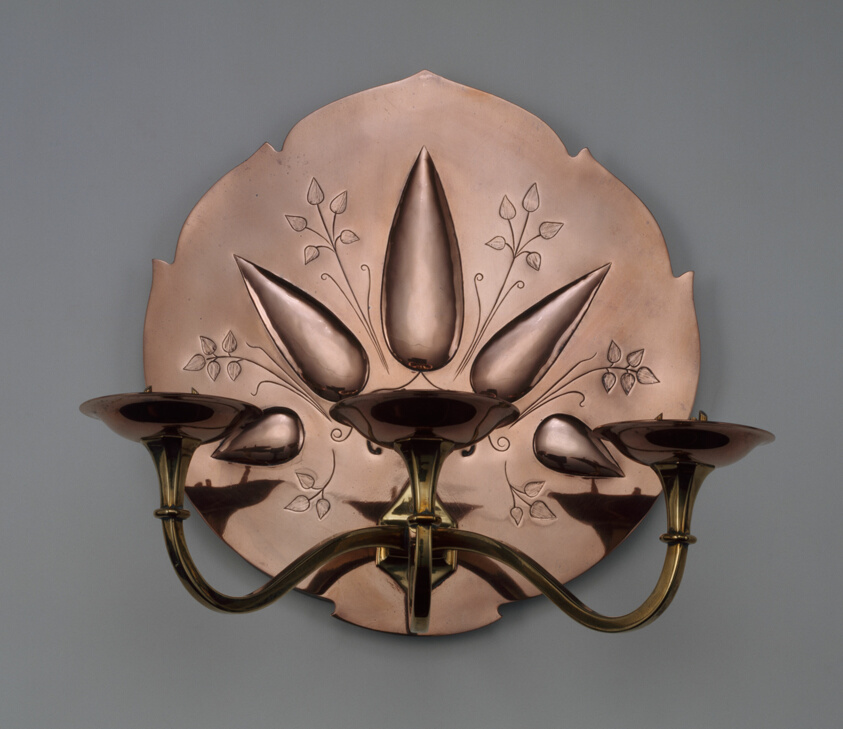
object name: Metalwork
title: Wall Sconce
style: Arts and Crafts Movement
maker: Designed by William Arthur Smith Benson (English, 1854-1924); Made by W. A .S. Benson & Co. (English, 1880-1920); England, London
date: 1880/1900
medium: Copper and brass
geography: England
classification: sconces (lighting devices); metalwork